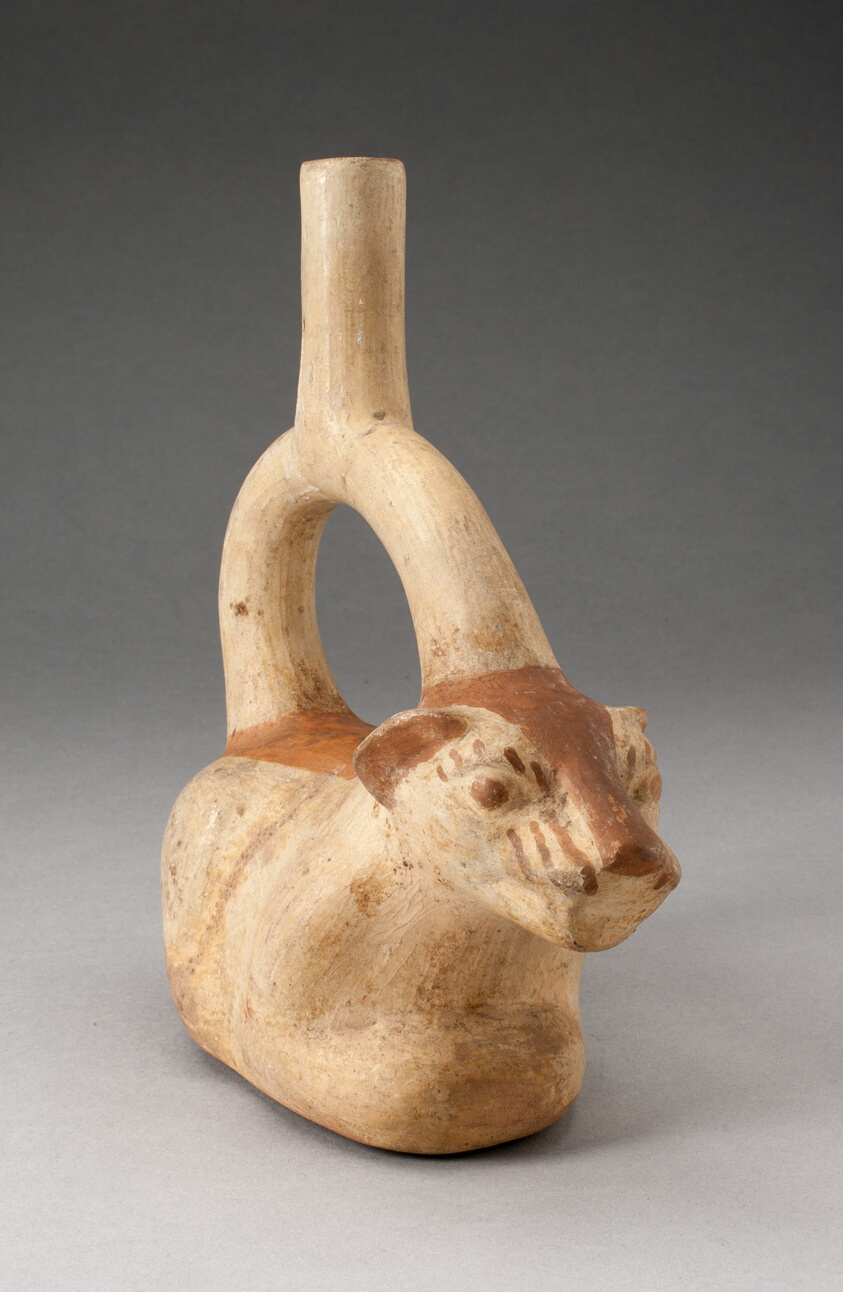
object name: Vessel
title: Stirrup Spout Vessel in Form of a Resting Feline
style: moche, Arts of the Americas, andes, south american, andean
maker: Moche (North coast, Peru)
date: 100 BCE–500 CE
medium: Ceramic and pigment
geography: Peruvian North Coast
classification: earthenware; ceramics; vessel; art of the americas